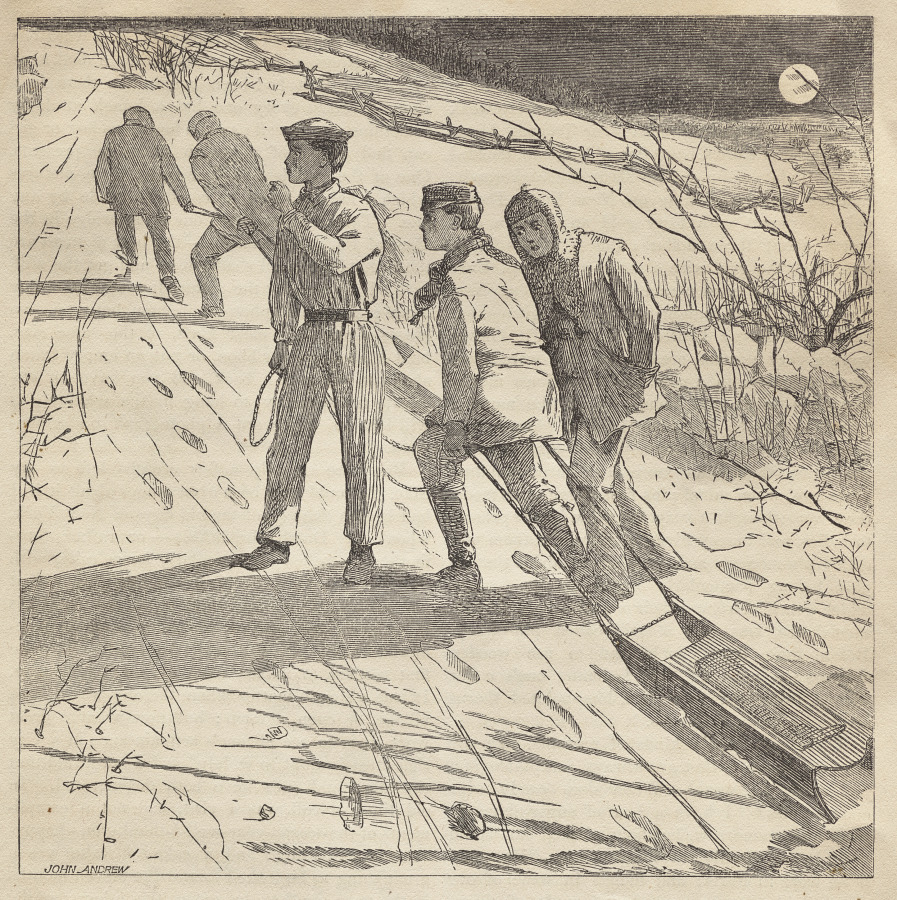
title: The Midnight Coast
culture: America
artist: Winslow Homer (American, 1836–1910)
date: 1867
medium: wood engraving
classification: Print